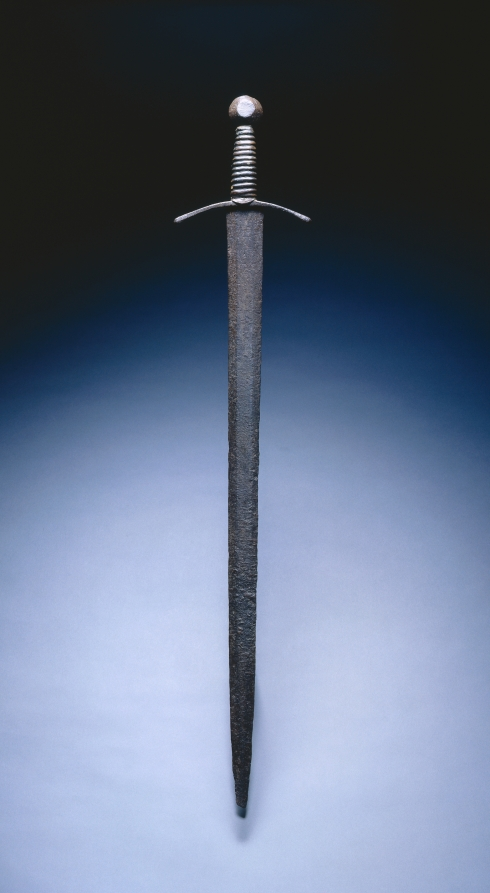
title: Sword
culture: European, early 15th century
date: c. 1400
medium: steel, leather, wire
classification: Arms and Armor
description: The principal weapon of the European knight was his sword, a simple weapon with a broad, two-edged blade, a straight crossguard, and a round pommel or counterweight. The pommel gave the knight full mastery of a perfectly balanced weapon. The basic shape of the sword did not change significantly between 1200 and 1500.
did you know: A sword required a different composition of steel than armor; as a result swordsmithing centers of Europe differ from those that specialized in armor.